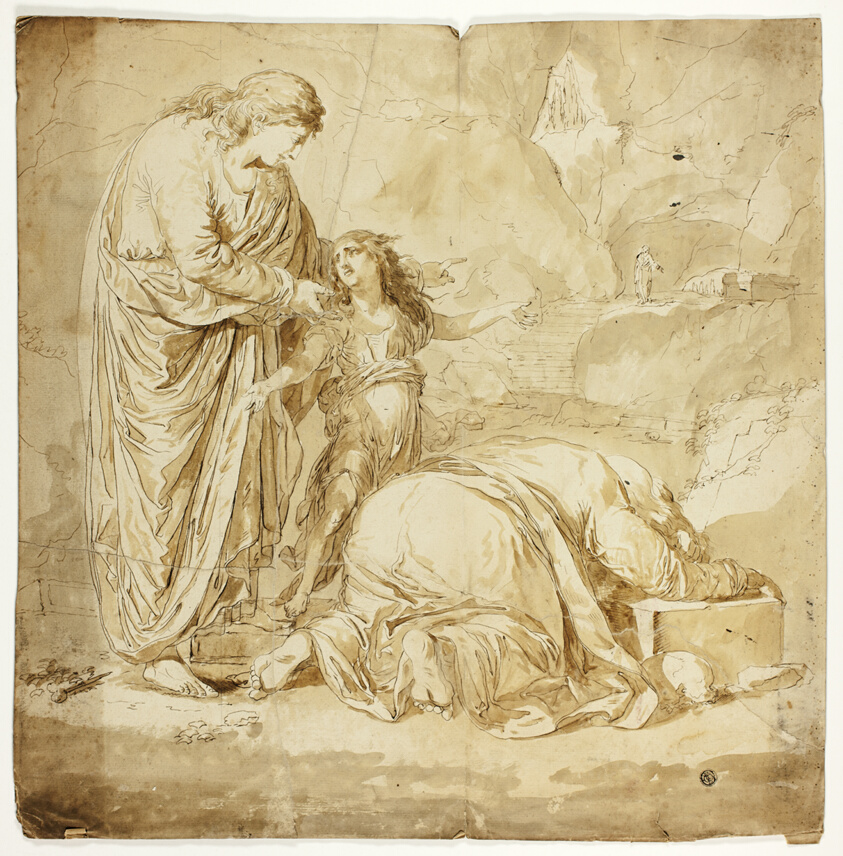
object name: Drawing and Watercolor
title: Biblical Scene with Two Women and Child in Foreground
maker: Unknown Artist; Possibly French or Italian, 19th century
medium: Pen and brown ink and brush and brown wash on cream laid paper, laid down on ivory laid paper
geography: France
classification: pen and ink drawings; brush and wash; paper; drawings (visual works); prints and drawing